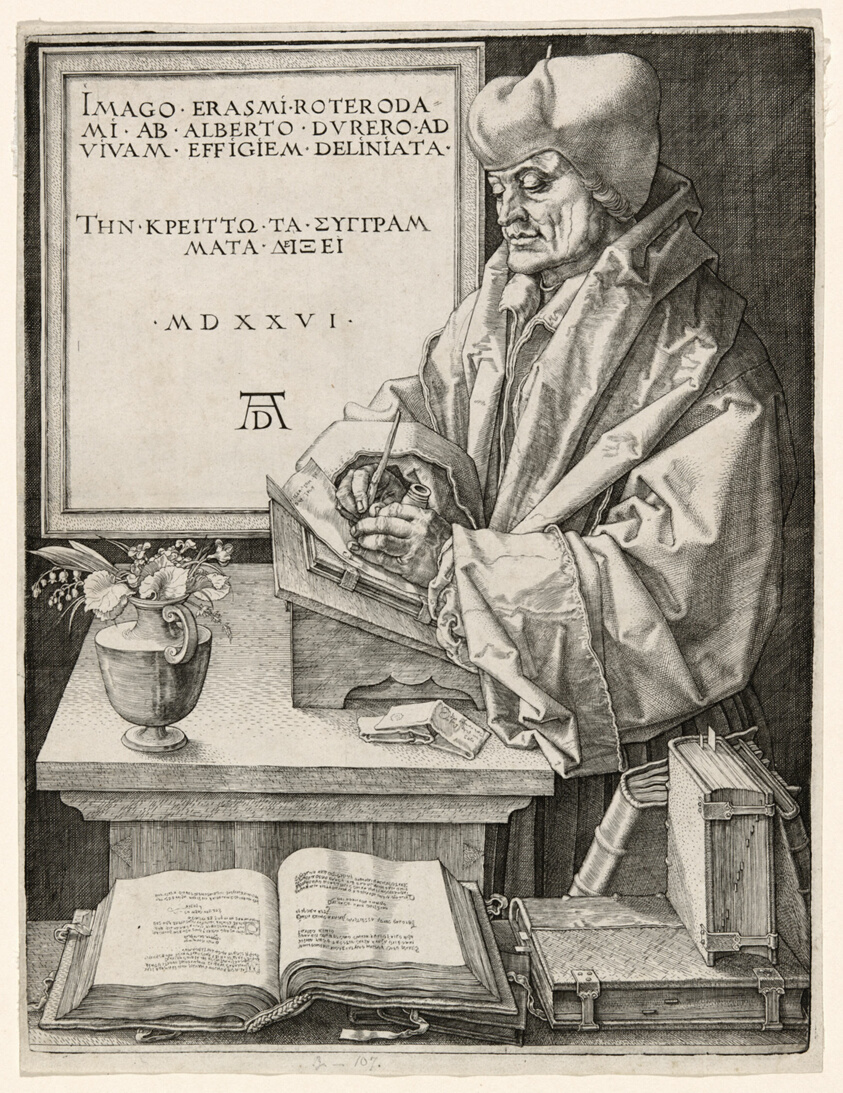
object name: Print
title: Erasmus of Rotterdam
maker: Albrecht Dürer (German, 1471-1528)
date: 1526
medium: Engraving in black on ivory laid paper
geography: Germany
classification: engraving; print; prints and drawing; paper